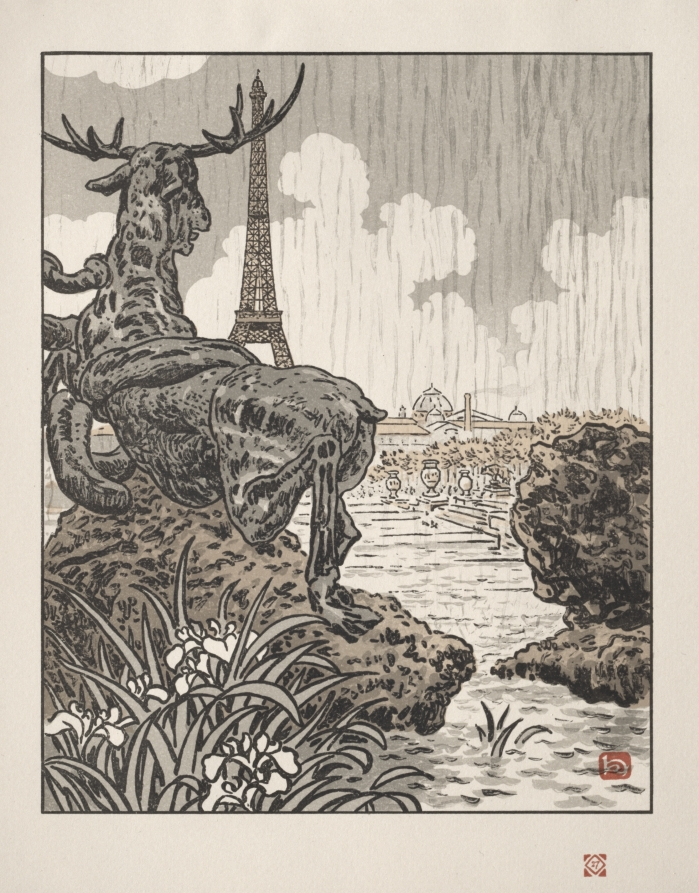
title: Thirty-Six Views of the Eiffel Tower: From Behind Frémiet's Elk (Trocadero)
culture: France, early 20th century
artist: Henri Rivière (French, 1864–1951)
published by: Printed by Verneau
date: 1902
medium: color lithograph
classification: Print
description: This view of Trocadero Park features one of the sculptures that surrounded a large basin that collected water from a large cascade. The sculpture of an elk stuggling with a boa constrictor was made only of plaster and was almost completely destroyed by 1910. The sculptor, Emmanuel Frémiet, studied animals at the botanical gardens in Paris, which exhibited both flora and fauna.